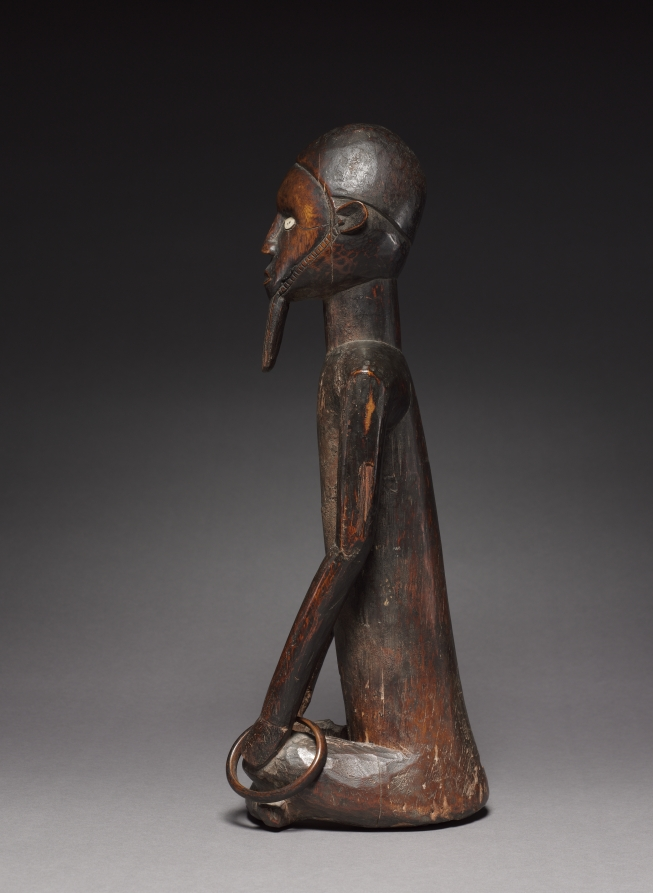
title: Male Figure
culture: Africa, Central Africa, Republic of the Congo, Beembe-style maker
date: late 1800s-early 1900s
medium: Wood, ceramic or Formica, copper alloy, and iron alloy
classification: Sculpture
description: This sculpture played a role in ancestral worship among the Beembe people. Ancestors are held in high regard among the Beembe, and this figure is thought to represent an idealized form of a deceased individual within the ethnic group. The object is one of only two seated male Beembe figures of this size in Western institutions.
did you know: This figure is considered “monumental” as most other types of Beembe figures measure about 15 centimeters tall.